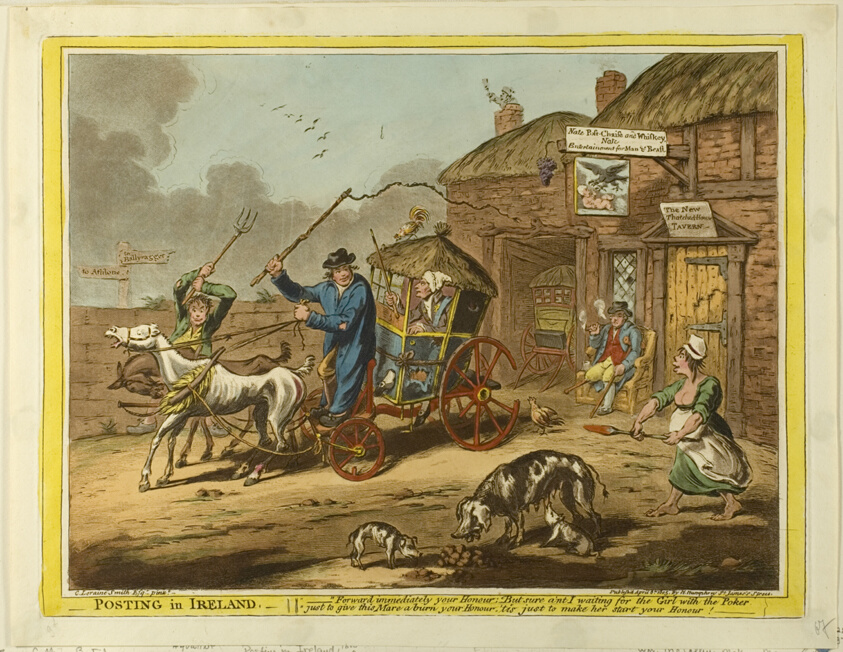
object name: Print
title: Posting in Ireland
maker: James Gillray (English, 1756-1815); published by Hannah Humphrey (English, c. 1745-1818)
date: published April 8, 1805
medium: Hand-colored etching and aquatint on paper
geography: England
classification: etching; print; prints and drawing